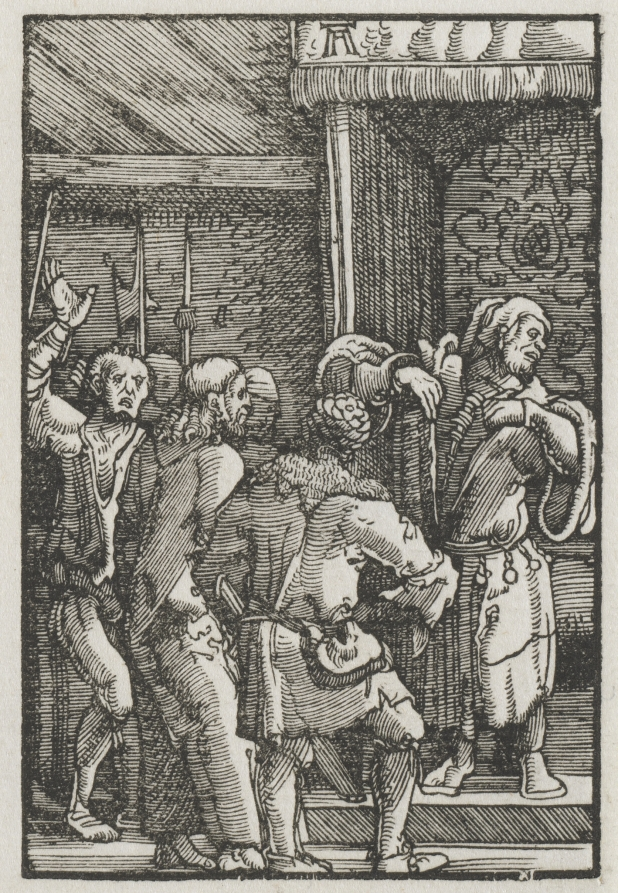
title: The Fall and Redemption of Man: Christ before Caiaphas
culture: Germany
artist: Albrecht Altdorfer (German, c. 1480–1538)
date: c. 1515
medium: woodcut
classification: Print